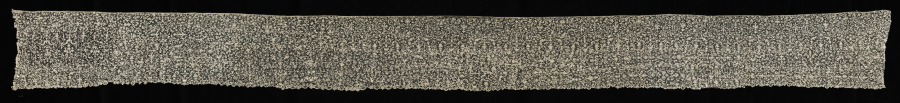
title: Lace Flounce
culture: France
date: 1660–1740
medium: Needle lace (Point de France)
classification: Lace